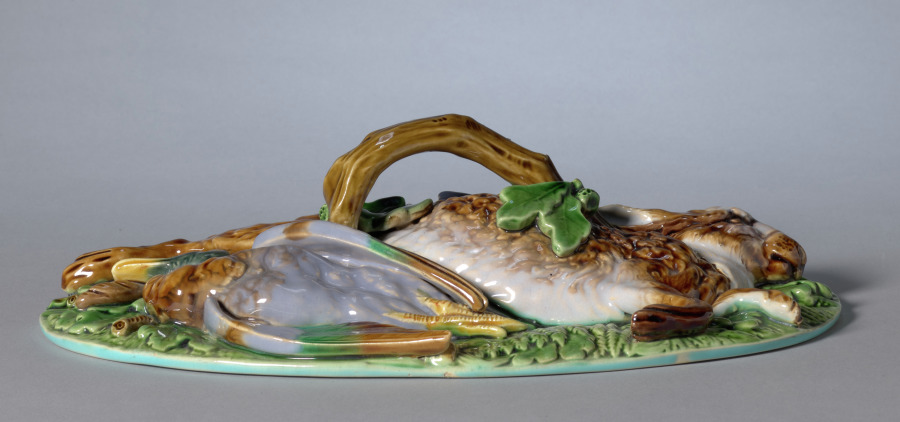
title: Game Pie Dish (Lid)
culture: England, 19th century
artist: Minton Pottery and Porcelain Factory (British)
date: c. 1860–80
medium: earthenware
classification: Ceramic